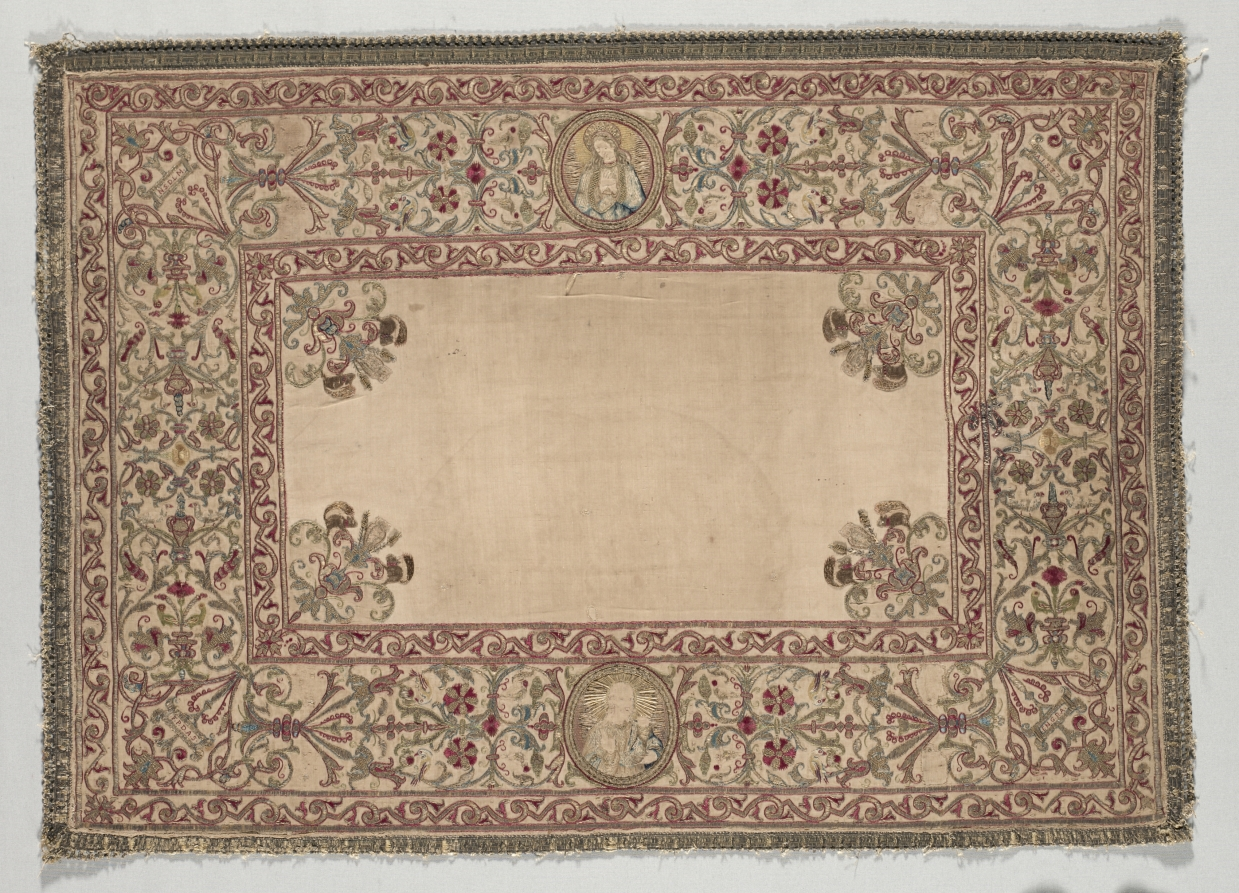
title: Chalice Cover (?)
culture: Italy, 16th century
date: 1587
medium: embroidery; silk and gold filé on linen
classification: Embroidery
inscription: unidentified initials of donors occur in three corners and the date 1587 in the fourth.